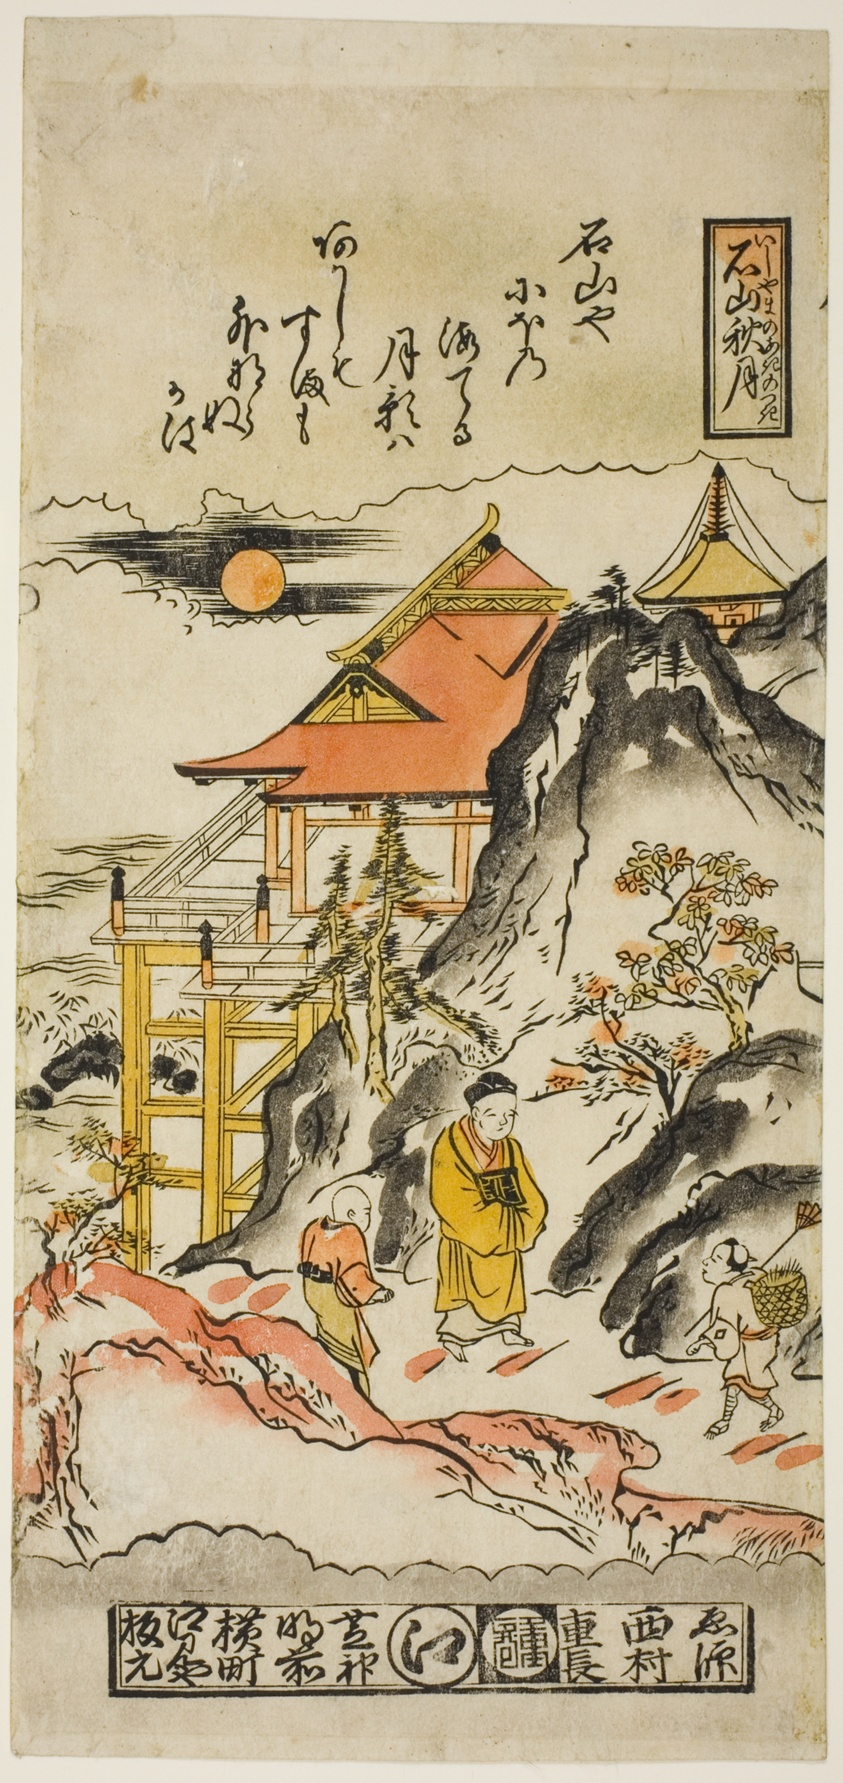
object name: Print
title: Autumn Moon at Ishiyama (Ishiyama no aki no tsuki), No. 8 from the series "Eight Views of Omi"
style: Japanese (culture or style)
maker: Nishimura Shigenaga (Japanese, 1697 (?)-1756)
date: c. 1716/36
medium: Hand-colored woodblock print; hosoban, urushi-e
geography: Japan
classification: woodblock print; print; asian art